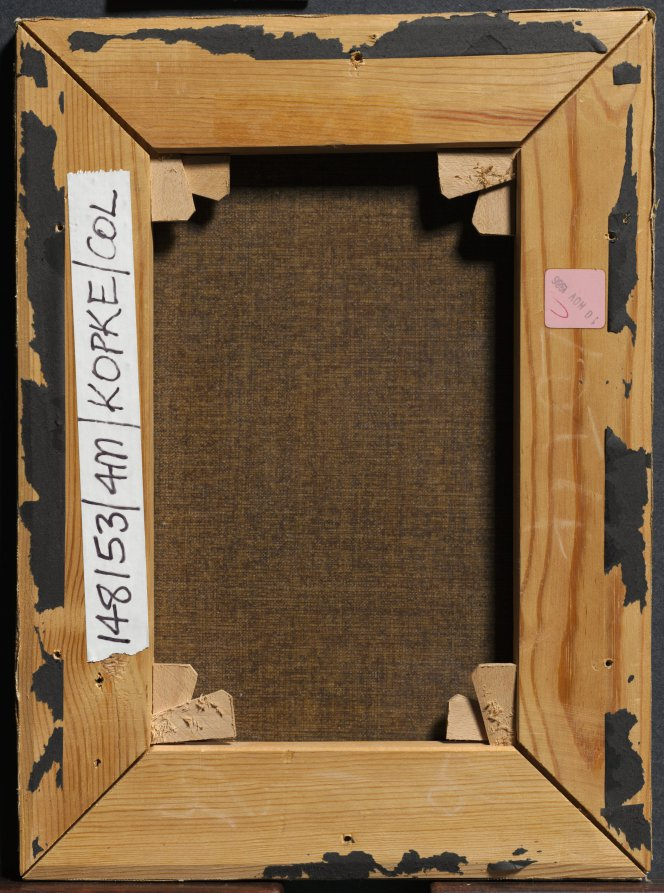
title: Dr. Johann Henning Kjetil Hjardemaal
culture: Denmark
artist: Christen Købke (Danish, 1810–1848)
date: 1833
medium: oil on fabric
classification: Painting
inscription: Signed and dated in black paint bottom right corner: C Köbke 1833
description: The sitter (1812-1844) was born on the island of Saint Thomas, at that time a colony in the Danish West Indies. He was sent to Copenhagen to study medicine and later set up practice at Satrup in Schleswig, then part of Denmark. For health reasons, he returned with his wife to the Virgin Islands, where they both died in 1844.